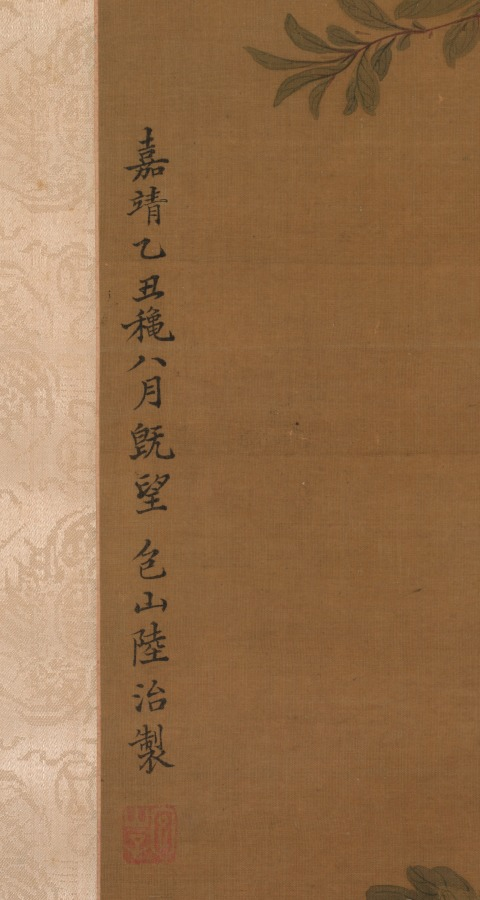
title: Flowers and Rocks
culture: China, Ming dynasty (1368–1644)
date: 1368–1644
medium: hanging scroll, color on silk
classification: Painting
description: Here, the painter uses delicate brushwork and vivid colors to depict an early summer scene of three kinds of flowers growing beside a garden rock: From top to bottom we see flowering pomegranate, then peonies, and lilies below. Like the peony, which conveys wishes for wealth and prosperity, the pomegranate flower, here in festive red color turning soon into fruit with many seeds, is associated with the wish for many sons. The lily, in Chinese "baihe," is a homophone with the pun "togetherness for a hundred years," expressing wishes for harmony and unity. The scroll would have made a suitable gift to married women.